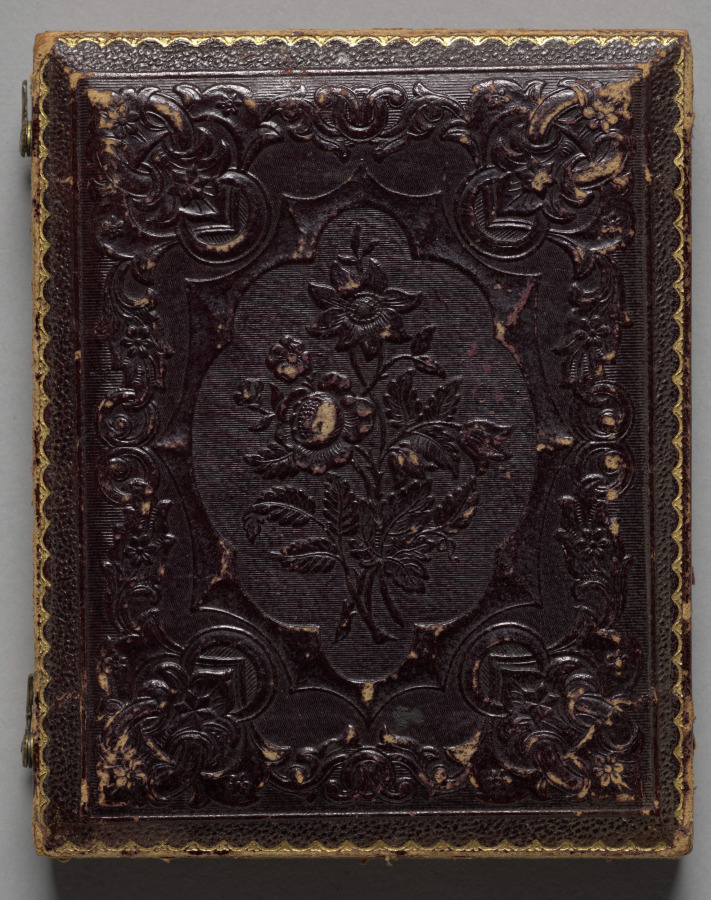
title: Three Carpenters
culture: America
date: c. 1858–65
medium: ambrotype, quarter plate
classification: Photograph